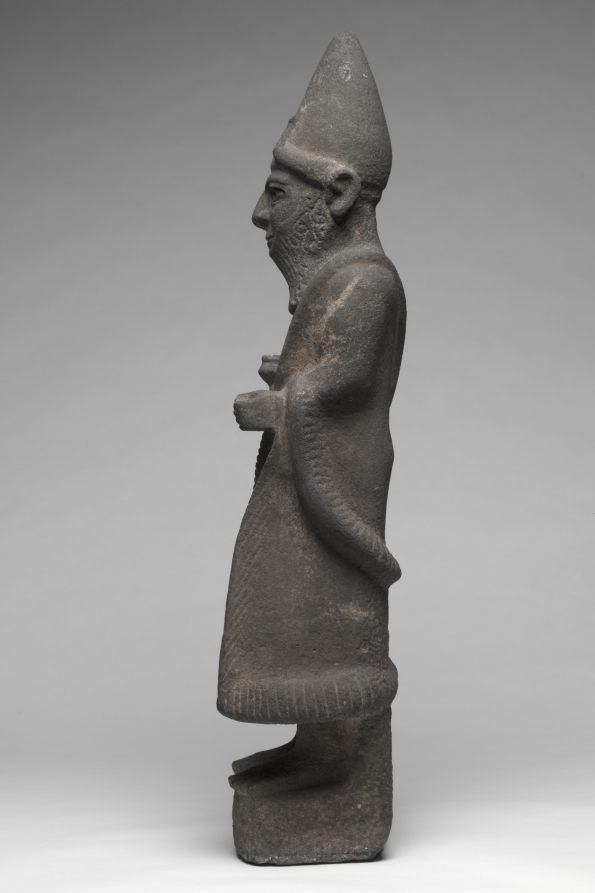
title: Priest-King or Deity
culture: Hittite, North Syria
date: c. 1600 BCE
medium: basalt with bone eyes (left, ancient; right, restored)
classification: Sculpture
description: The Hittites migrated into Anatolia in the 3rd millennium BCE and spoke an Indo-European language, a group that includes Greek, Latin, Persian, Sanskrit, English, and most modern European languages. They were the first ancient people to use iron for weapons. From about 1600–1200 BCE their empire was at its peak, extending from central Anatolia to Syria, and south along the eastern Mediterranean. Their vast empire and interest in commerce enabled the Hittites to spread Mesopotamian ideas and culture throughout the ancient Mediterranean world. This large basalt sculpture is exceptionally rare in depicting a Hittite god or priest-king wearing a horned conical crown, false beard, and long robe. He holds a bowl in his right hand and once held something in his left, perhaps a staff or sword.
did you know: The left eye of the sculpture is the original bone inlay while the right eye is a modern restoration done after the piece was damaged.